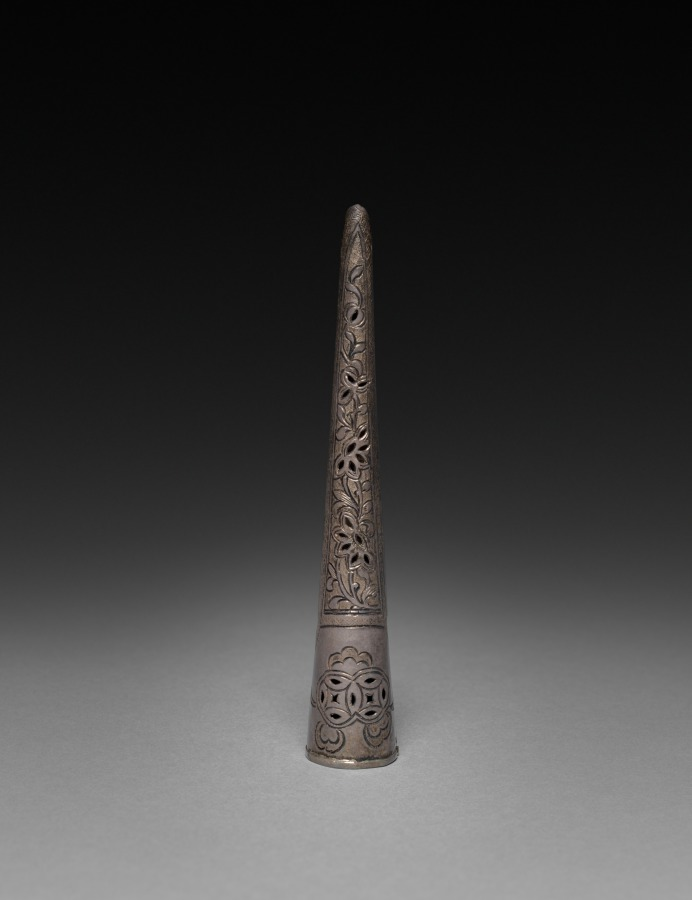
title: Fingernail Protector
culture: China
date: early 1900s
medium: metal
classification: Jewelry